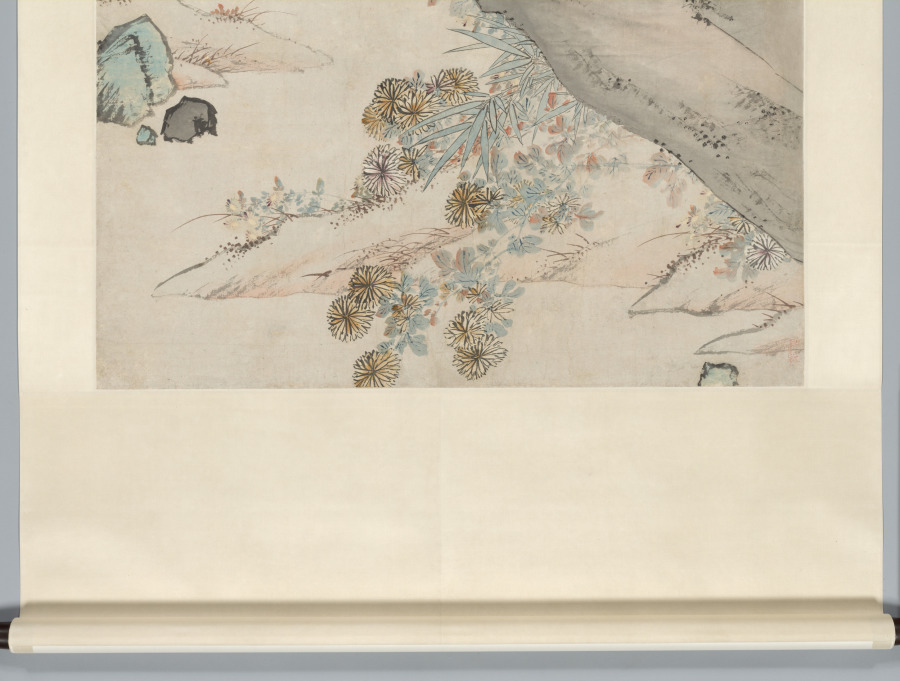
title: Yellow Chrysanthemums and Red Osmanthus in the Style of Wang Yuan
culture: China, Ming dynasty (1368–1644)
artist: Shen Zhou (Chinese, 1427–1509)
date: 1468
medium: hanging scroll, ink on paper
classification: Painting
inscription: Artist's inscription, signature, and 2 seals at upper right: Beneath the fence yellow [chrysanthemum] flowers brave the rain to blossom;/ Still others lean on the red osmanthus tree and dazzle the deep green moss./ With a goblet [of wine] I face them, entirely without concern;/ Who will answer the knocking at the gate where a guest has arrived? In the ninth month of the fourth year of the Chenghua era [1468], I followed the brush-conception of Wang Danxuan 王澹軒 [Wang Yuan 王淵] at the Youzhuzhuang 有竹庄 [House with Bamboo]. Inscribed and [painted] by Shen Zhou 沈周 of Changzhou 長洲. [seals] Shitian 石田; Shen shi Qinan 沈氏启南. trans. HR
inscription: 1 additional inscription, dated 1523, and 2 seals of Wang Chong 王寵 (1494-1533).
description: Shen Zhou, a native from Suzhou, was descended from a prominent land-owning family with strong ties to literati culture. Because Shen Zhou never entered government service, he had ample opportunity to cultivate the arts of painting, poetry, and calligraphy. Chrysanthemums and red osmanthus both bloom in autumn. The deep orange osmanthus flowers emanate a characteristically sweet fragrance. According to his inscription on the painting, Shen Zhou sought to imitate the style of the Yuan dynasty (1271–1368) painter Wang Yuan. His color-filled brushstrokes and washes, however, anticipate the flower painting style of Yun Shouping, whose Peonies are also in the Cleveland Museum of Art collection, https://www.clevelandart.org/art/1967.192. The sheer size and complex composition of this scroll are impressive.